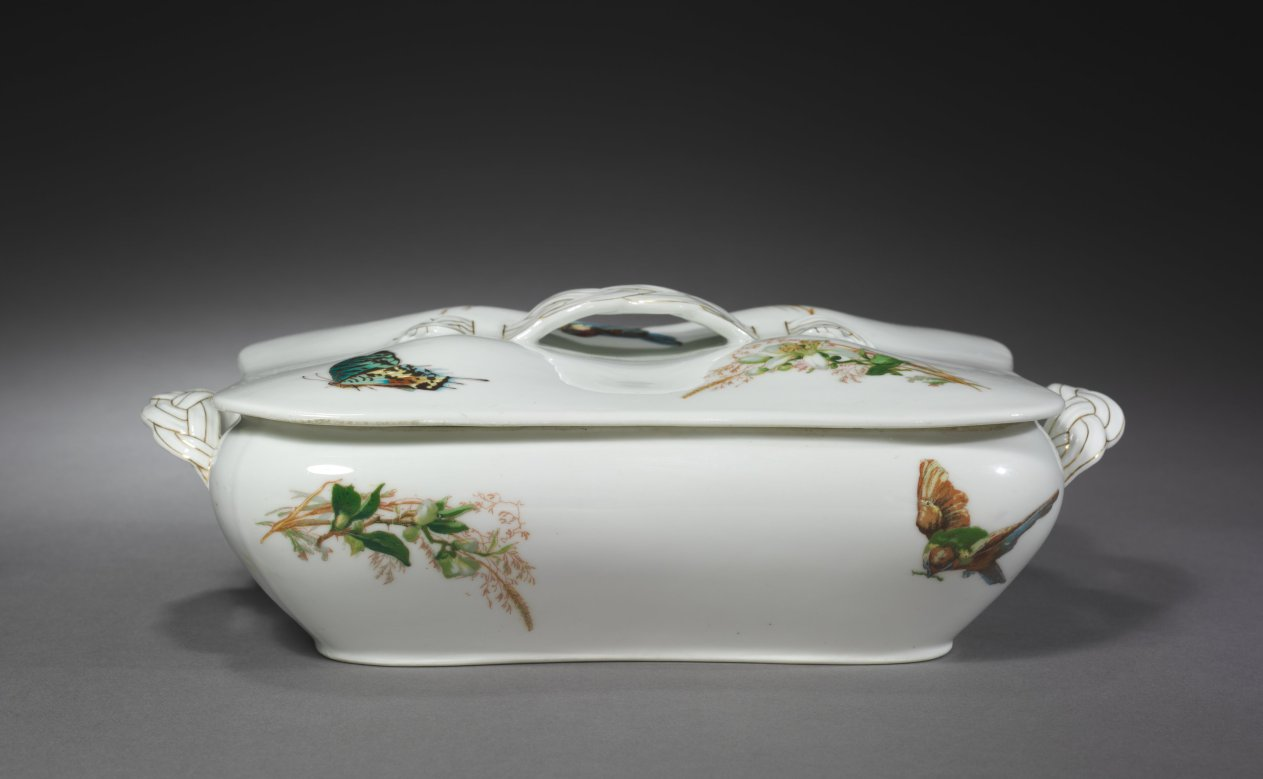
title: Covered Vegetable Bowl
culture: France, Limoges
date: c. 1890–1910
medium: porcelain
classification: Ceramic